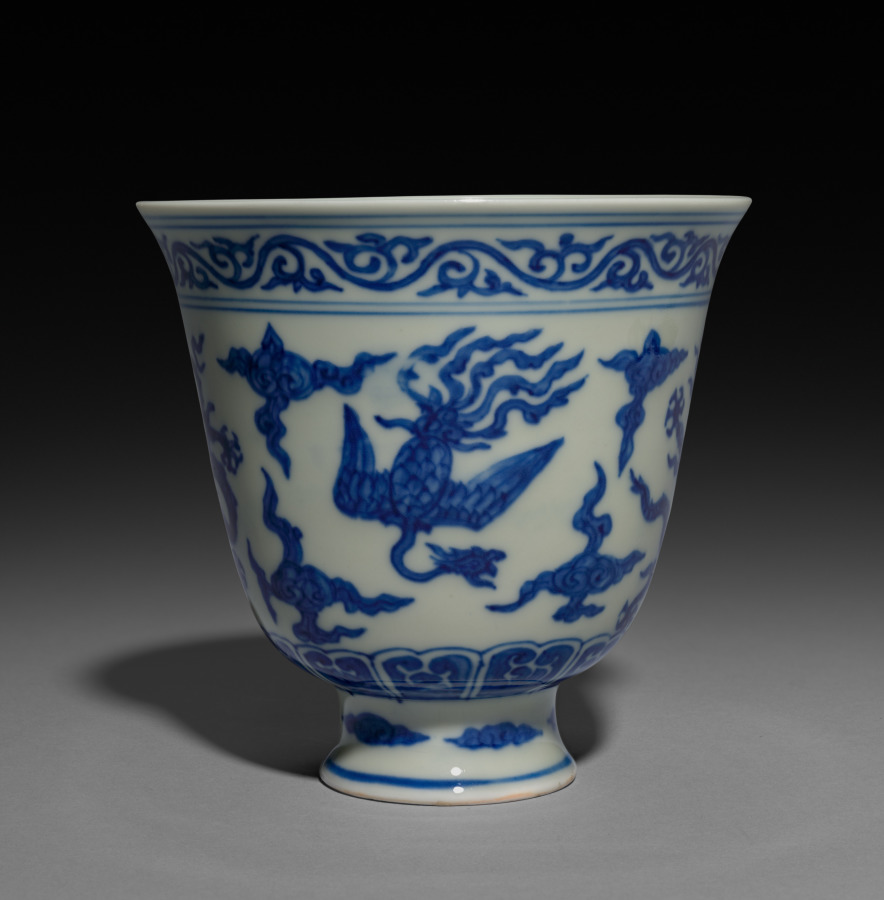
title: Cup with Dragons and Phoenixes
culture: China, Jiangxi province, Jingdezhen kilns, Ming dynasty (1368-1644), Jiajing mark and reign (1522-66)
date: 1522–66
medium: porcelain with underglaze blue decoration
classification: Ceramic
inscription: 大明嘉靖年製